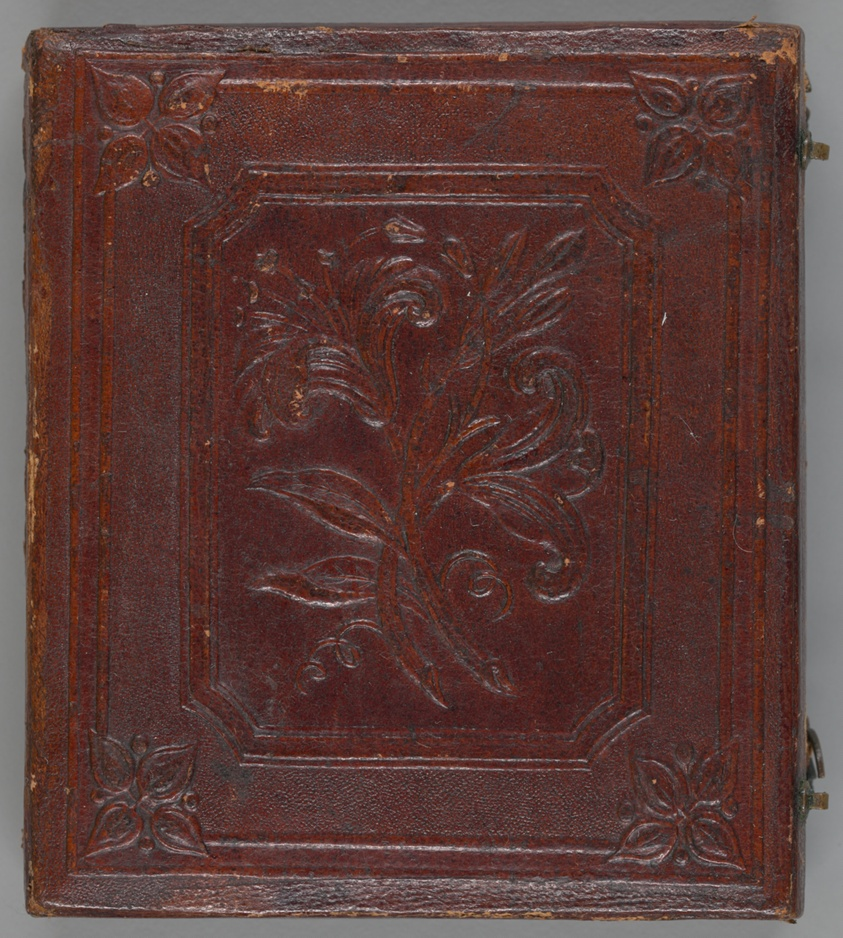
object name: Photograph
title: Untitled (Young Girl Holding Photograph)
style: 19th century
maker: Artist unknown; 19th century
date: 1839/99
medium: Daguerreotype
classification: photography; photograph